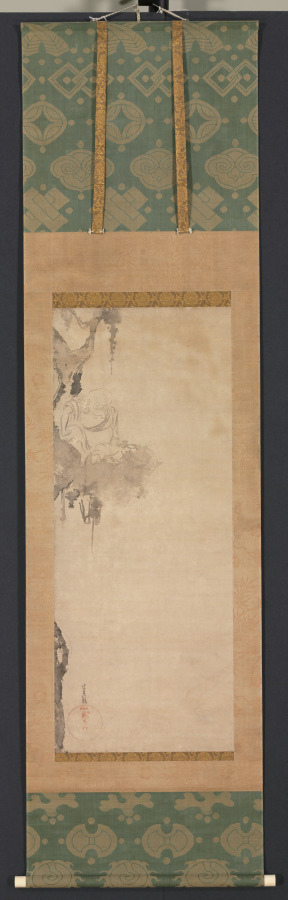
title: The Bird's Nest Patriarch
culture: Japan, Edo period (1615–1868)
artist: Tawaraya Sōtatsu (Japanese, c. 1570–c. 1640)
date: early to mid-1600s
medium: hanging scroll; ink on paper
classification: Painting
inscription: signed at the lower left of the scroll and sealed "Inen" in red circular form.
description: Tawaraya Sōtatsu’s painting was inspired by a 1602 Chinese book that featured images of legendary Chinese Buddhist experts and Daoist sages. The monk portrayed here is Niaoge, which literally means “Bird’s Nest.” He was a Zen practitioner who favored the isolation of treetops, from which he offered advice to the perplexed. The posture of the single figure suggests a dialogue with someone below. Sōtatsu was a master of the “boneless” (mokkotsu), or un-outlined, style of ink painting that relies on layered pools of ink wash for effect.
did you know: This painting is based on the 1602 illustrated publication Marvelous Traces of Immortals and Buddhas (Chinese: Xianfo qizong).